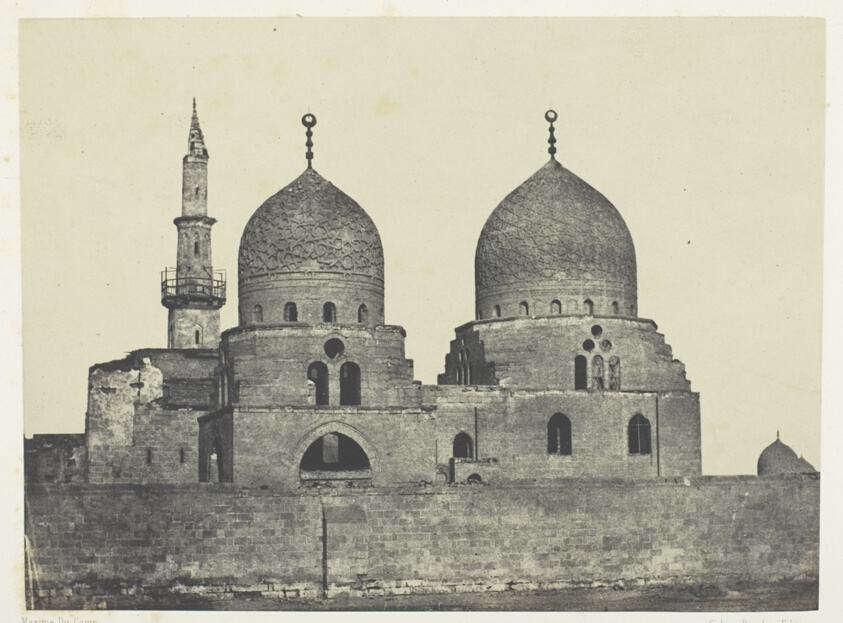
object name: Photograph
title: Mosquée et Tombeau du Sultan Kansou-el-Gouri, Le Kaire, plate 7 from the album "Egypte, Nubie, Palestine et Syrie" (1852)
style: 19th century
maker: Maxime Du Camp (French, 1822–1894)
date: 1849/51, printed 1852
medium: Salted paper print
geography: France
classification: salted paper print; photographic process; photography; photograph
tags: Collected by Hugh Edwards, Egypte, Nubie, Palestine et Syrie